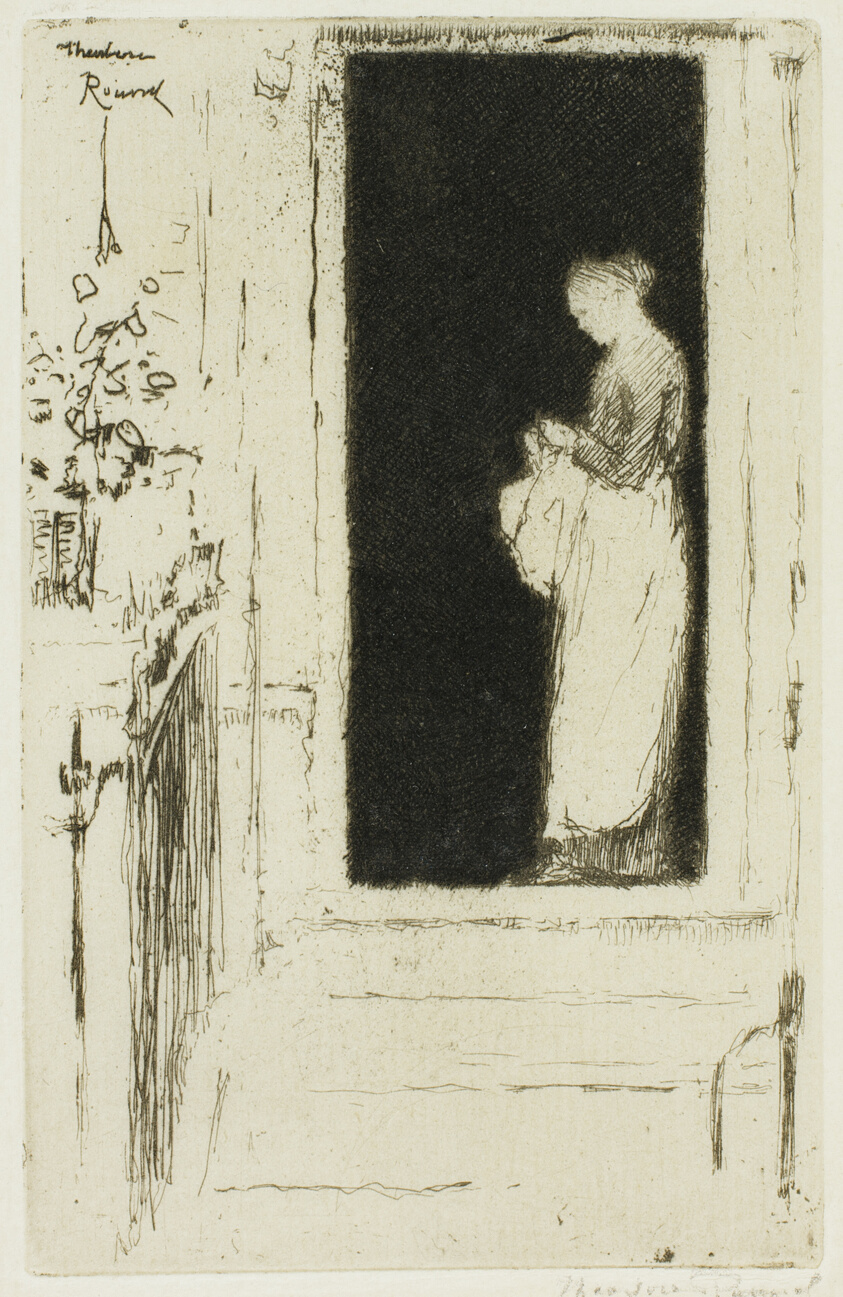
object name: Print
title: Penelope, A Doorway Chelsea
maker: Theodore Roussel (French, worked in England, 1847-1926)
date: 1888–89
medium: Etching in black on thin cream laid paper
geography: England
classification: etching; paper; print; prints and drawing